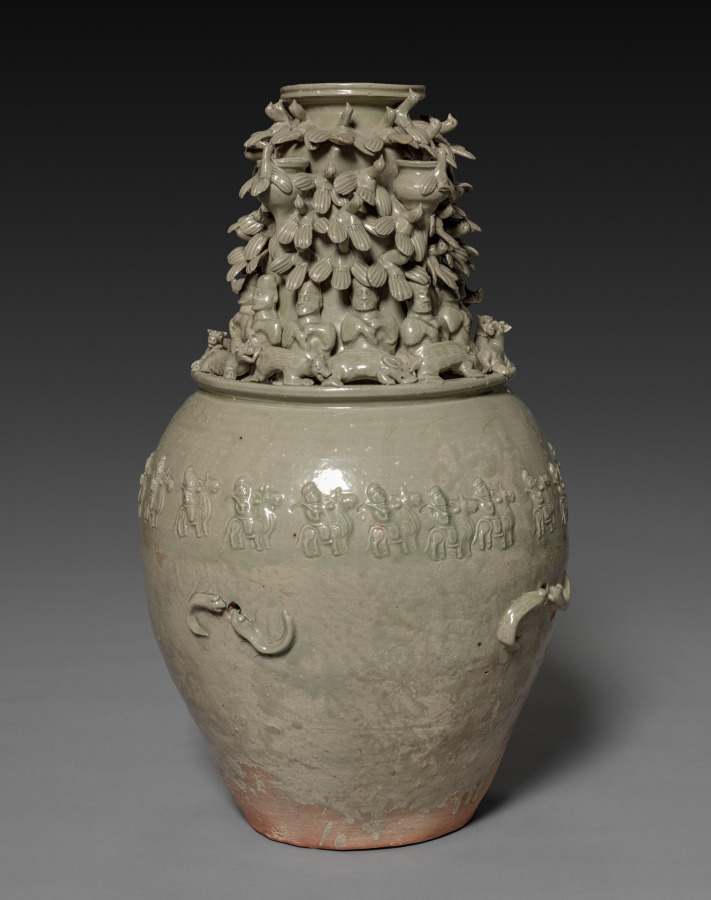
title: Funerary Urn (Hunping) with Figures, Pavilions, and Birds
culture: China, Western Jin dynasty (265-316 CE)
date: 265–316 CE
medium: glazed stoneware with molded and sculpted decoration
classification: Ceramic